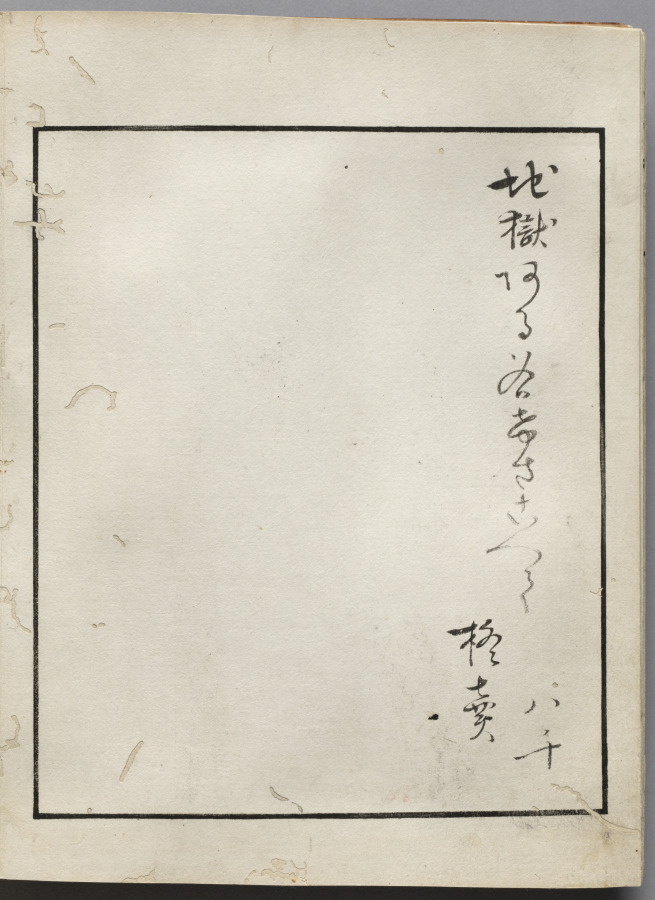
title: Double-Leaf from Album of Actor Portraits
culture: Japan, Edo period (1615–1868)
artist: Shōrakusai (Japanese)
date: c. 1790–1810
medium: double-leaf from an accordion-style album; ink on paper (right) and ink and color on silk (left)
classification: Bound Volume